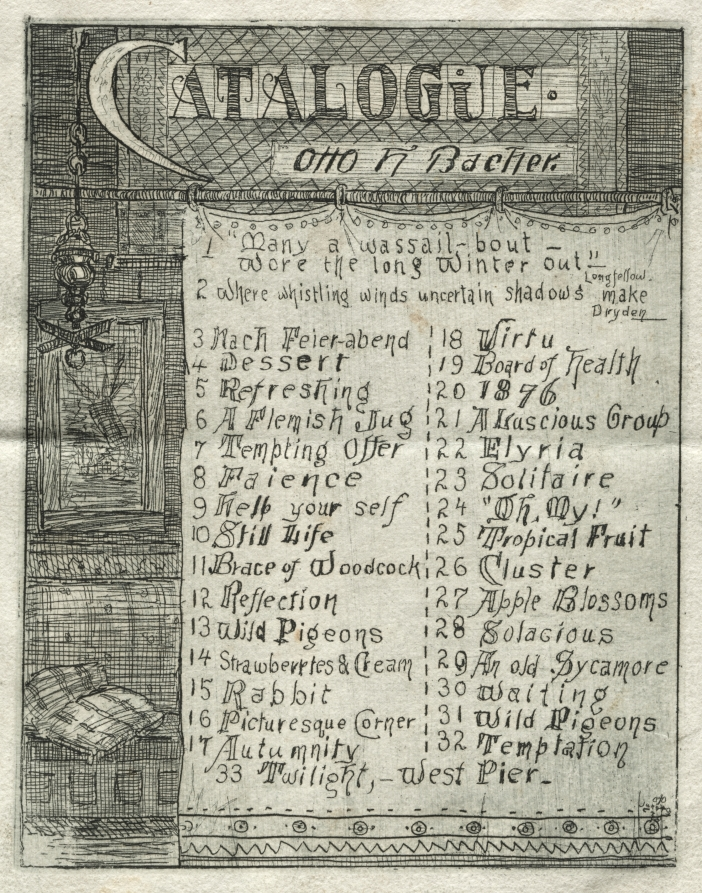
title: Catalogue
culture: America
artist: Otto H. Bacher (American, 1856–1909)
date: 1878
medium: etching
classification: Print